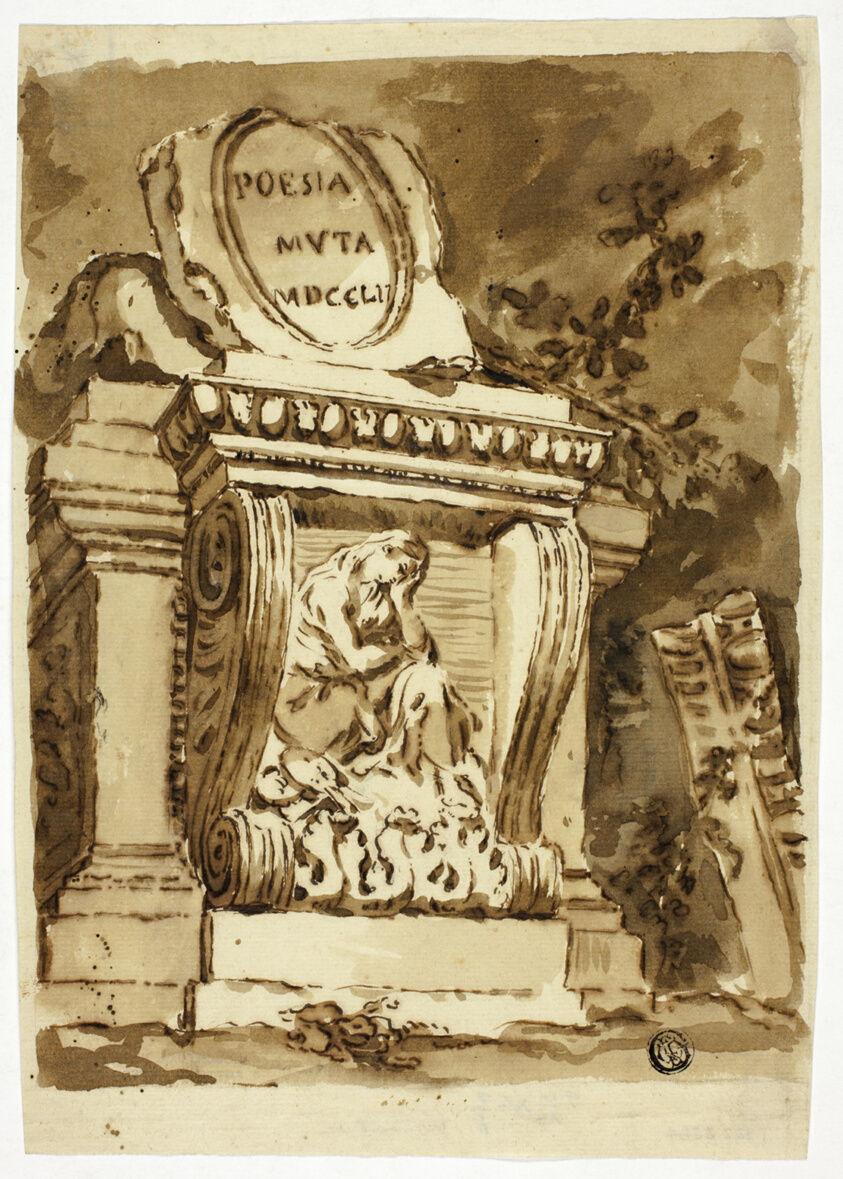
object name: Drawing and Watercolor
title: Funerary Monument Inscribed "Poesia Muta"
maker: Unknown Artist; French, 18th century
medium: Pen and brown ink, and brush and brown wash, on cream laid paper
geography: France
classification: pen and ink drawings; drawings (visual works); prints and drawing